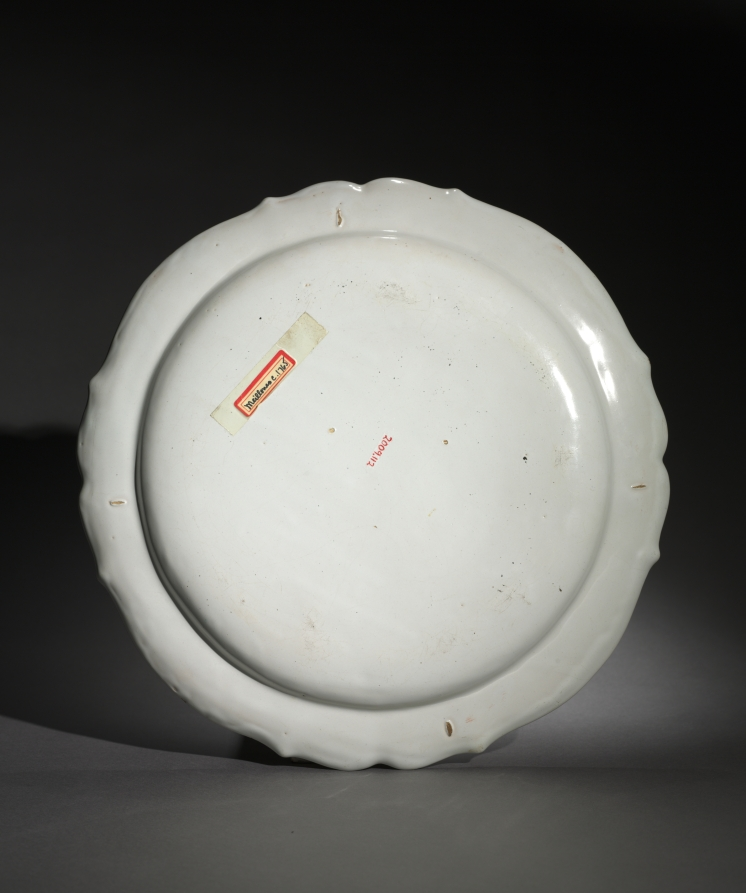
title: Plate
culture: France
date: c. 1750–70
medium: faience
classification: Ceramic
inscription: Tag on the back of plate reads "Meillones c. 1765"